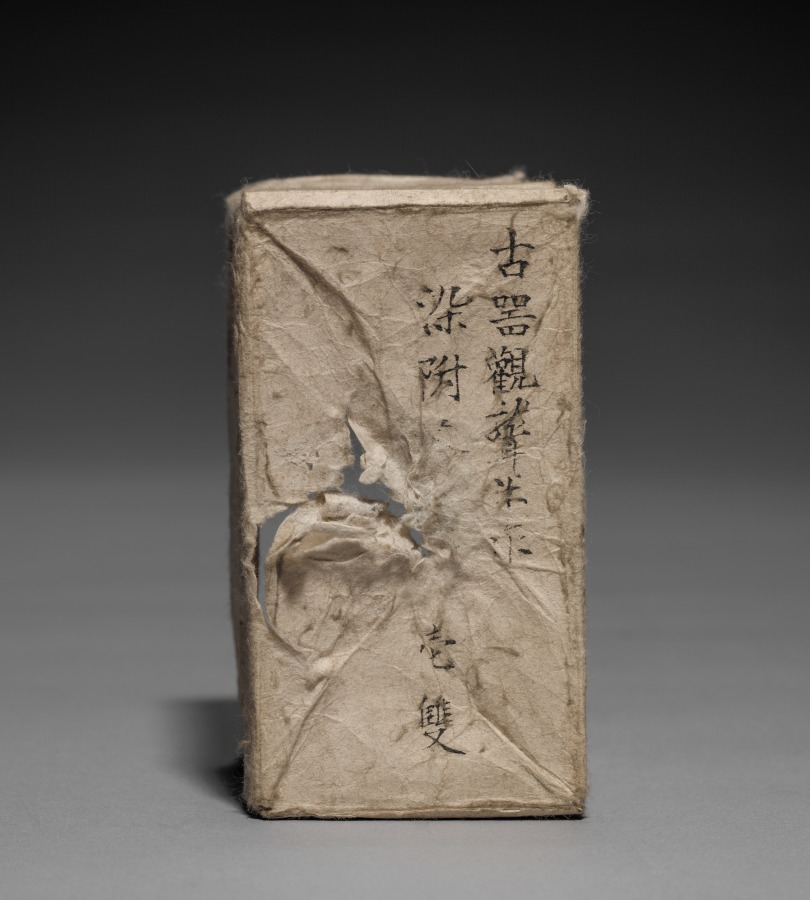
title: Pair of Tea Containers with Plum Blossoms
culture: Japan, Edo period (1615–1868)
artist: Aoki Mokubei (Japanese, 1767–1833)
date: early 1800s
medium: porcelain with underglaze blue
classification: Ceramic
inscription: signed "Ro Mokubei" on base in underglaze blue.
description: Aoki Mokubei, born into a family of restaurateurs, was a potter, calligrapher, painter, and scholar, and is considered one of the three masters of later Edo period Kyoto ceramics. He specialized in porcelains fashioned after Chinese prototypes, and created works for steeped tea (sencha) such as these matching tea caddies decorated in an underglaze blue called sometsuke—literally “with applied dye.” He signed them on their bottoms. They also have intricately patterned silk sleeves to both beautify and protect them. On the exterior of the lid of the outer wooden box that contains them, it is written that Mokubei inscribed and painted an image on the box. On the interior of the lid, the signature and seals of a former owner are written. Mokubei has signed the lid of the inner box, and a charming ink and light color composition of West Lake in Hangzhou in China covers its three sides. On the fourth side is a long inscription by Mokubei describing the scene.